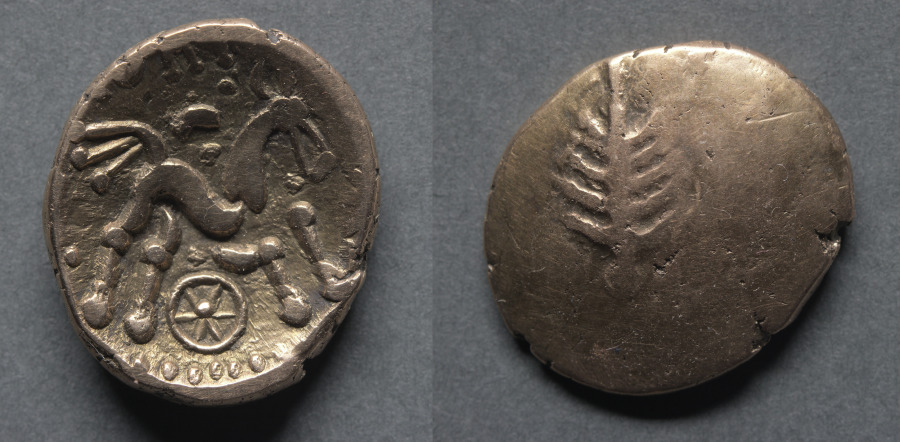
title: Catti Stater: Tree Symbol on Plain Field (obverse); Horse and Wheel (reverse)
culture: England, Dobunni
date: 20–45 CE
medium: gold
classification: Coins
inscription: CATTI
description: This piece comes from Dobunni territory, the tribe occupying an area in the Cotswold (Severn estuary) country. The names found on them are probably those of chieftains rather than of kings. Names such as Catti, Antedrig, Inam, and Comux appear on various pieces, all names unknown in history. The horse has now become crude on his journey to the wilder parts of the country, but the wheel of the lost chariot remains.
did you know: The Dobunni were one of the tribes believed to have issued coins before the Romans' arrival.